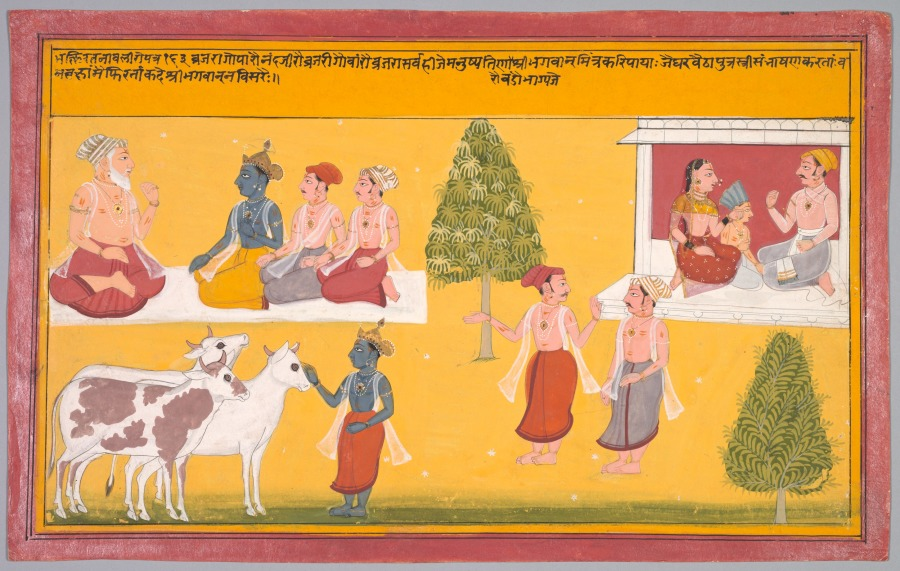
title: Friends of Krishna, folio 163 from a Bhakti Ratnavali of Vishnu Puri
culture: Northwestern India, Rajasthan, Rajput Kingdom of Mewar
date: 1725–50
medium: Gum tempera and gold on paper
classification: Painting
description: In the upper left vignette, the blue-skinned Krishna sits with two of his friends before Nanda, his foster father and head of the cowherd village in Braj, where he spent his youth. Below, he interacts with three adoring cows. The scene in the upper right corner accords with the end of the verse at the top of the page, which reads, “The one who speaks about him to his wife and son at home will never be abandoned by him.” The text is drawn from a compendium of devotional verses excerpted from the extensive Bhagavata Purana by the medieval commentator Vishnu Puri.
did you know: The entire background has been painted with the pigment known as Indian yellow, which CMA conservators identified by observing its bright fluorescence under ultraviolet light.